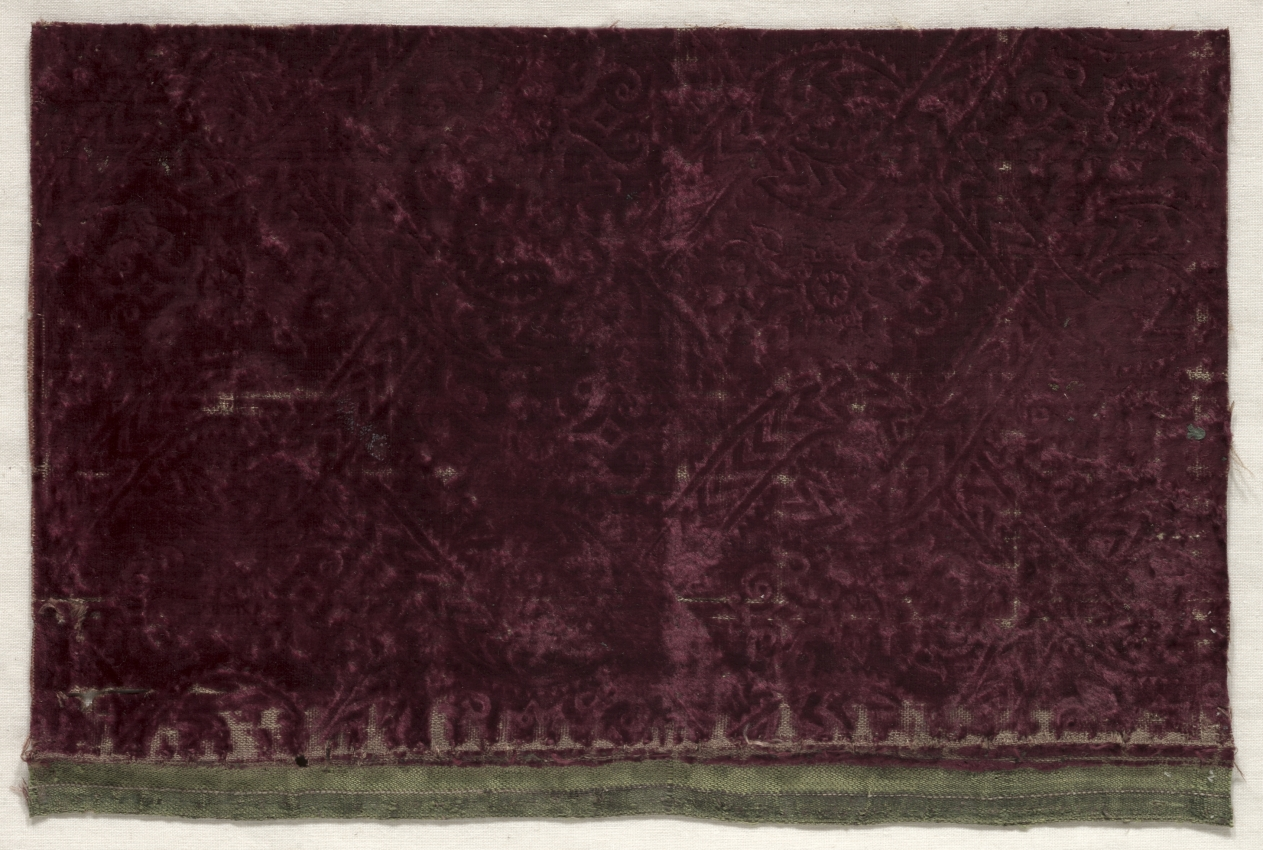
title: Fragment of Stamped Velvet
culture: Spain, first half of 17th century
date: first half of 17th century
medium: velvet (cut and stamped): silk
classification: Velvet